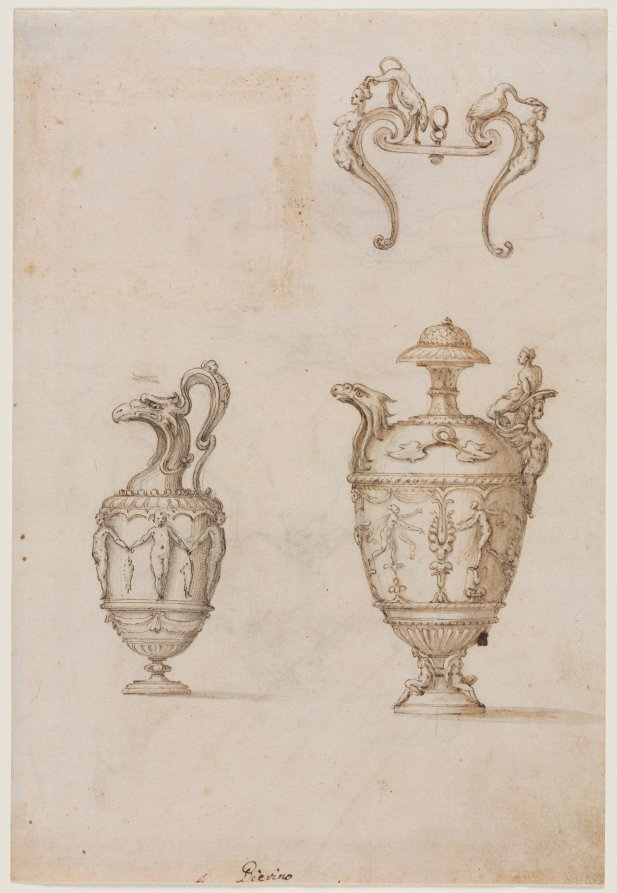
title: Design for Two Vases and an Ornament (recto)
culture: Italy, 16th century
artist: Luzio Romano (Italian, active 1528–75)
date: mid 1500s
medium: pen and brown ink and brush and brown wash, with brush and gray wash (left vase), over black chalk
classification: Drawing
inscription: lower center, in brown ink: Pierino